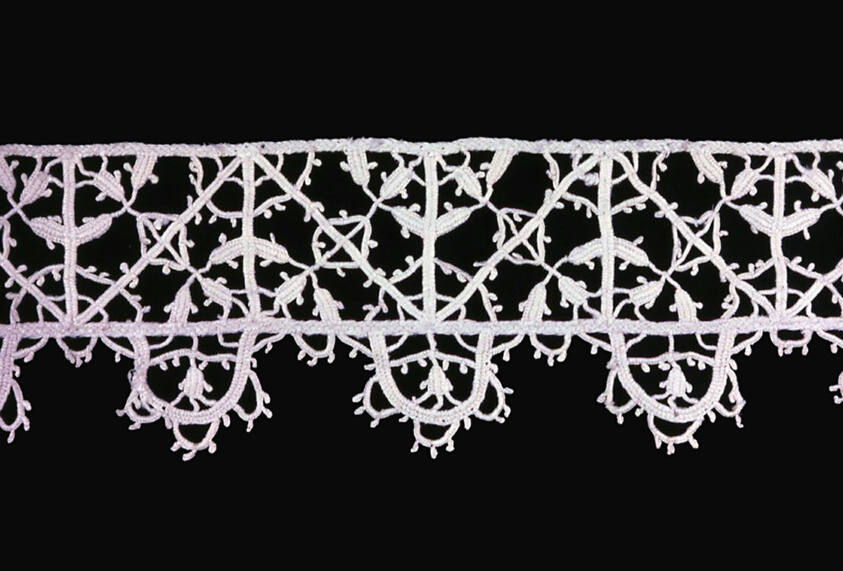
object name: Textile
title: Border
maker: Italy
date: 1601/25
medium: Linen, needle lace worked on a laid and plaited thread grid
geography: Italy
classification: textile; lace - needle